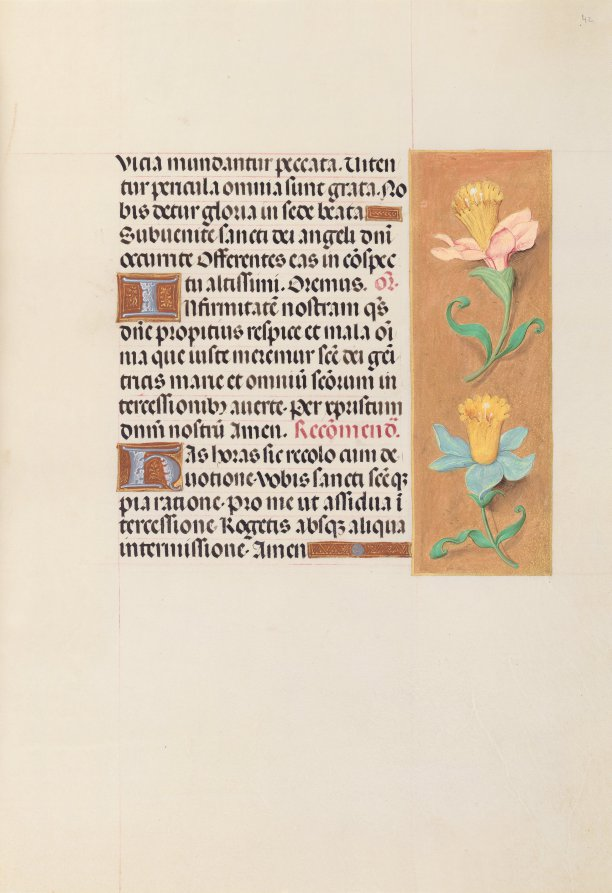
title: Hours of Queen Isabella the Catholic, Queen of Spain: Fol. 42r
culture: Flanders, Ghent and Bruges, late 15th century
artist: Master of the First Prayerbook of Maximillian (Flemish, c. 1444–1519)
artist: and Associates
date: c. 1500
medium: ink, tempera, and gold on vellum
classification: Bound Volume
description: This manuscript was illuminated by a circle of at least five highly organized manuscript painters active in the Flemish cities of Ghent and Bruges. The principal illuminator was Alexander Bening, who painted the majority of the book's miniatures. Manuscripts produced by this circle of artists are renowned for the decoration of their borders, which typically feature a rich variety of realistically-painted flowers, birds, and butterflies. This prayer book, called a book of hours, was intended not for a cleric, but for the private devotions of a lay person-in this case, Isabella the Catholic, Queen of Spain (1451-1504). Isabella's coat of arms embellishes the book's frontispiece. It is unlikely that the book was commissioned by the Queen herself; rather, she probably received it as a diplomatic gift from someone courting her patronage, perhaps Cardinal Francisco Jimenez de Cisneros. A Franciscan friar, Jimenez was dependent upon Isabella for his advancement, first to the post of Queen's confessor in 1492, and then to Archbishop of Toledo in 1495.